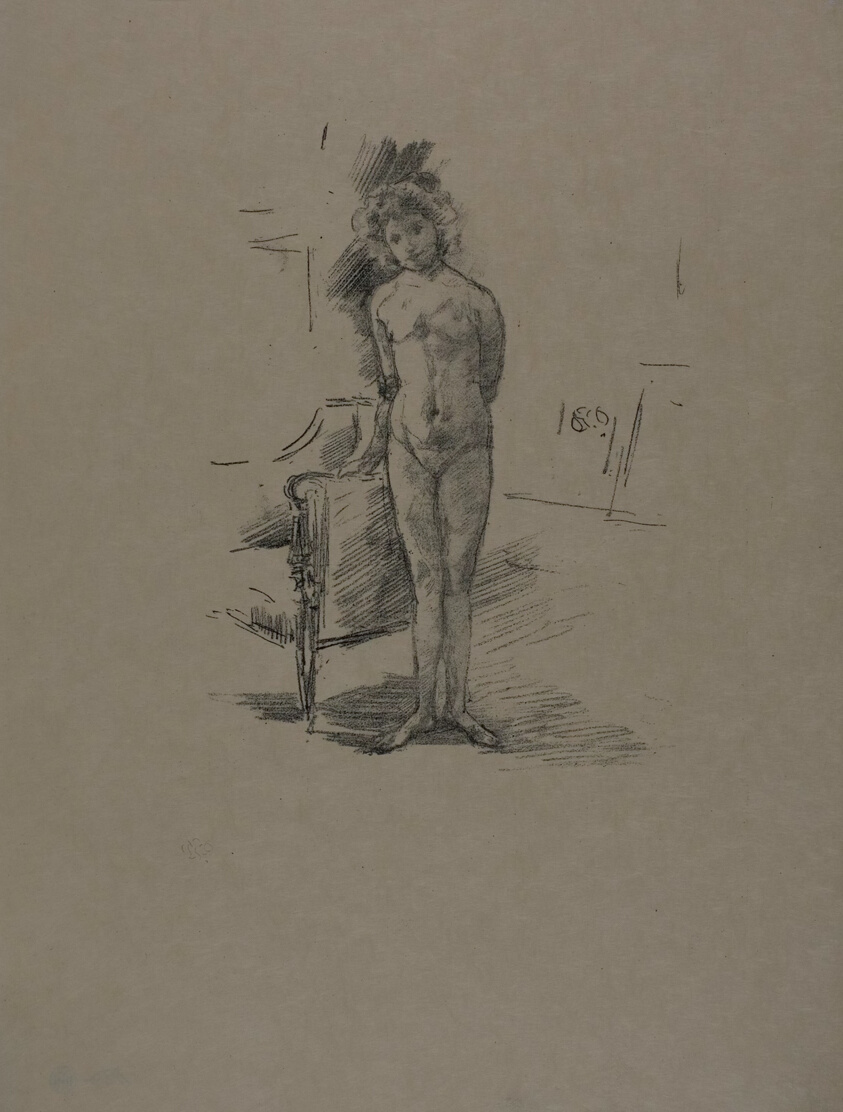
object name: Print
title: Little London Model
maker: James McNeill Whistler (American, 1834-1903)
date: 1896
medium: Transfer lithograph in black on cream wove Japanese vellum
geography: United States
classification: transfer lithograph; lithograph; print; prints and drawing